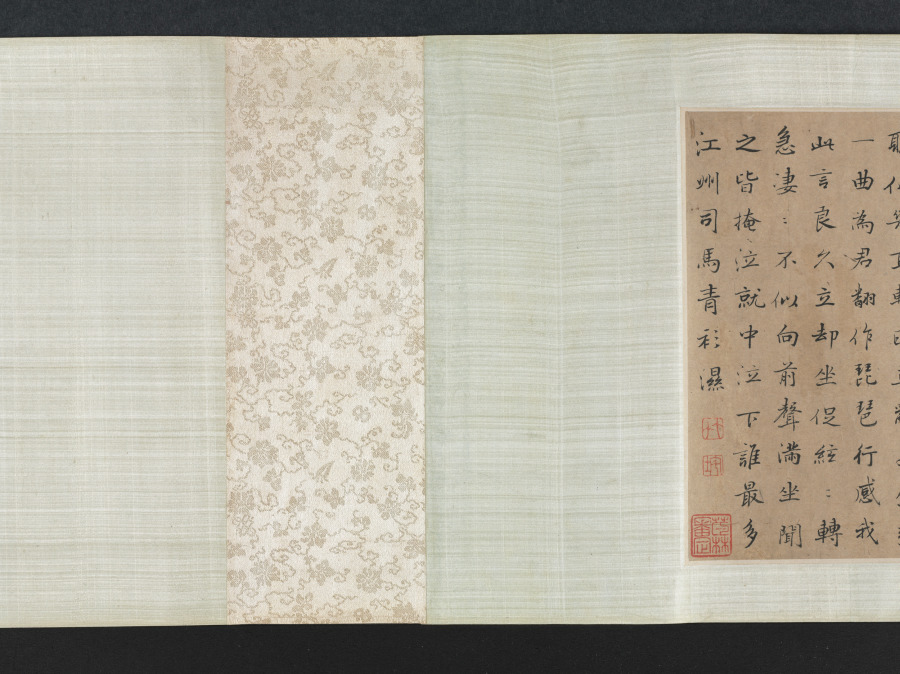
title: Saying Farewell at Xunyang (Song of the Pipa)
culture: China, Ming dynasty (1368–1644)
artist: Wen Boren (Chinese, 1502–1575)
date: 1500s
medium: handscroll, ink and color on paper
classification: Painting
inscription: "潯陽送客圖" 五峰山人文伯仁寫于停雲館中 [印] 文伯仁; 五峰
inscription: 2 colophons and 9 additional seals: 1 transcription of "Pipa xing 琵琶行” (Song of Pipa) and 3 seals of Zhu Yizun 朱彜尊 (1629-1709); 2 seals of Wu Rongguang 吳榮光 (1773-1843); 1 colophon, dated 1826, and 3 seals of Wu Xijia 吳錫嘉 (mid-1700s)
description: This handscroll depicts The Song of the Pipa, a poem by Bai Juyi 白居易 (772–846) written after the poet’s encounter with a pipa player on the Yangzi River. Expelled from her home city when her beauty and fame had faded, she played for the poet at night. Her musical performance and tragic life story resonated with Bai Juyi, who had just been demoted and exiled from life at court himself. The hazy, vast view and pale color tonalities of this painting illustrate these feelings of endless sadness, having lost one’s sense of purpose in life.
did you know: Wen Boren depicted the chilly autumn water with a fishnet pattern.